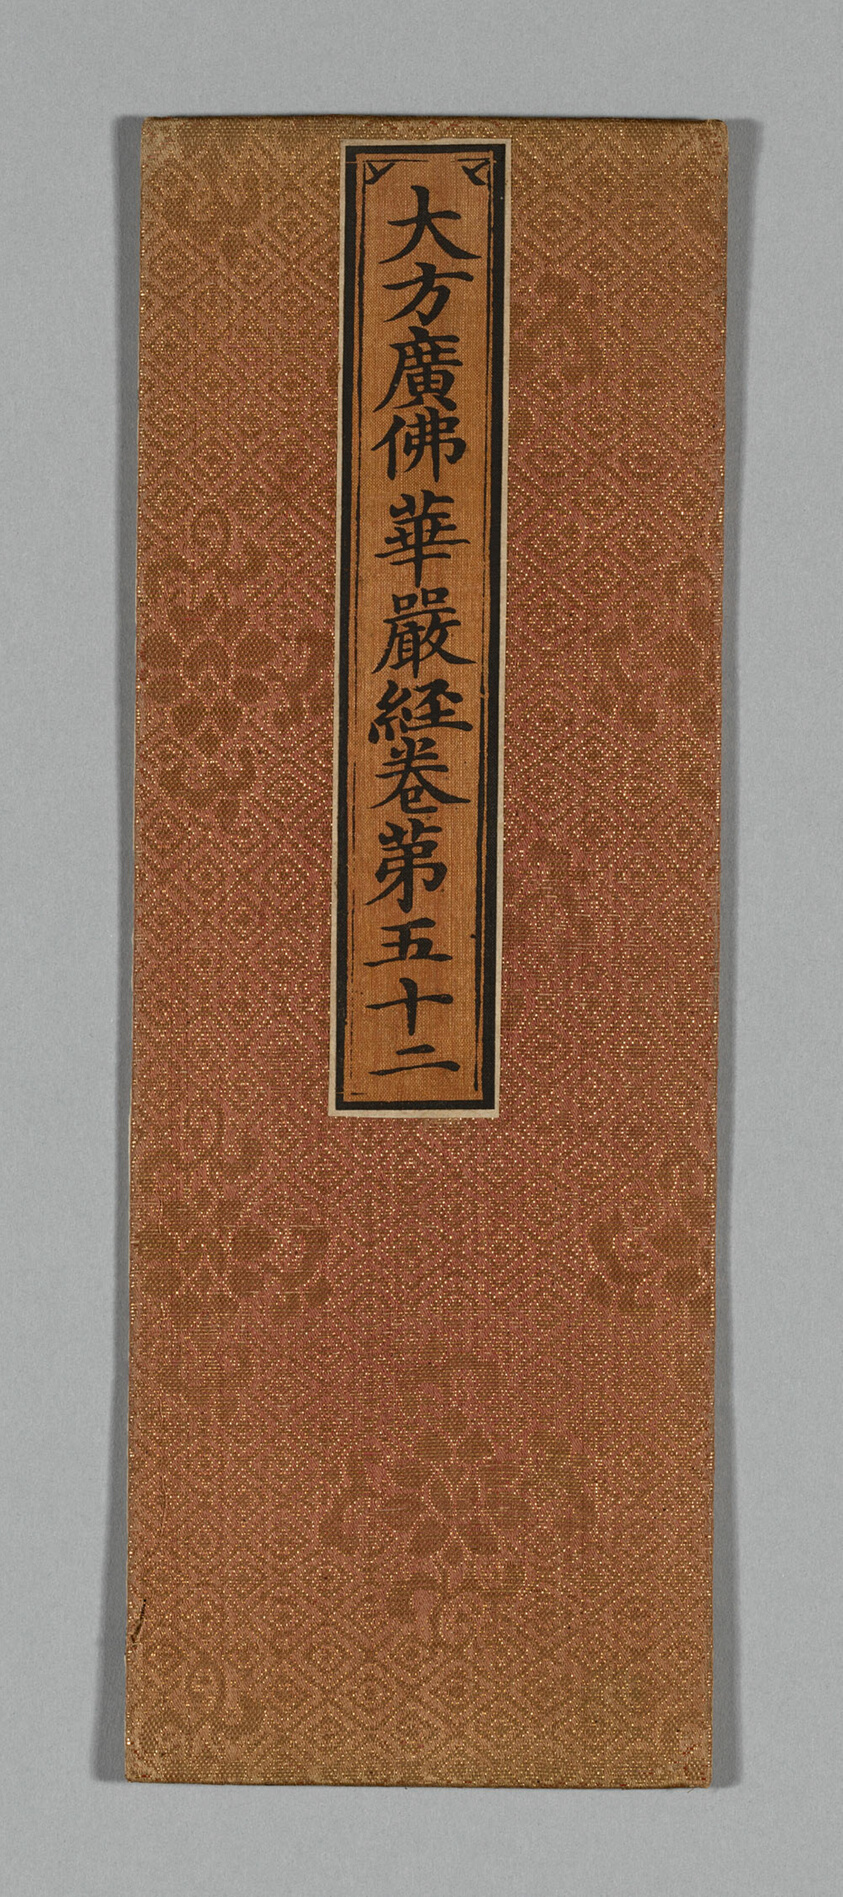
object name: Textile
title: Sutra Cover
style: ming, Chinese (culture or style), East Asian, asian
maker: China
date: Ming dynasty (1368–1644), c. 1590s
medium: Silk and gold-leaf-over-lacquered-paper strips, satin weave with patterning wefts; wrapped over cardboard and backed with paper; applied label of silk, plain weave; with inscribed title painted and/or printed with ink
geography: China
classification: textile; weaving